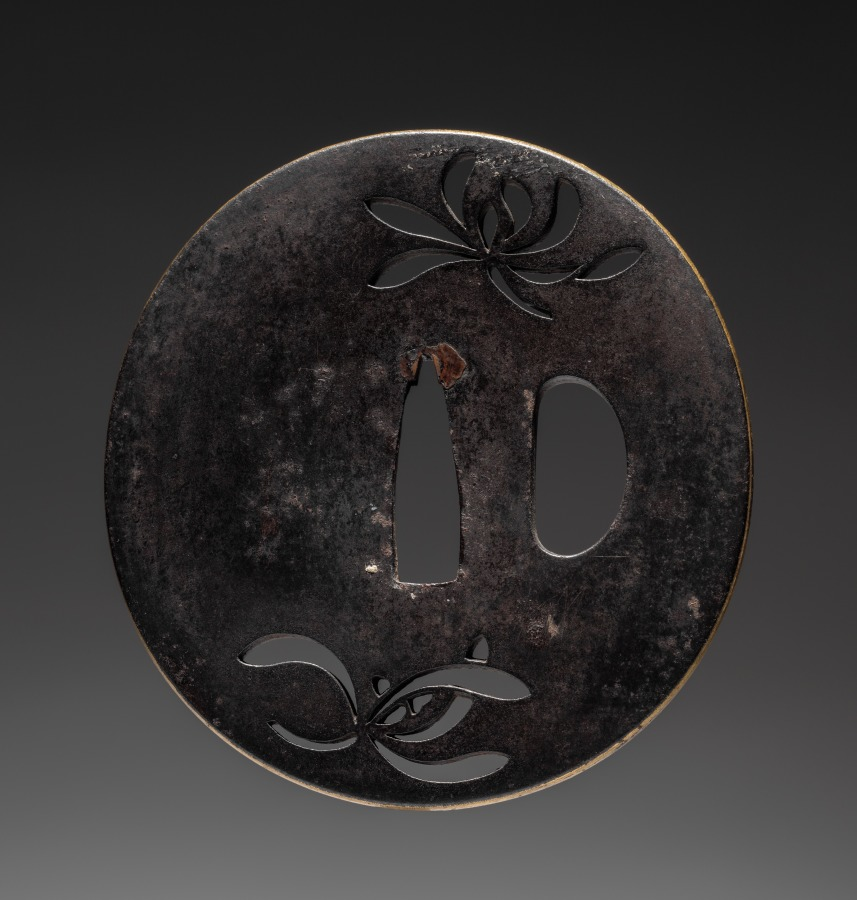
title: Sword Guard (Tsuba)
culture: Japan, Edo period (1615–1868)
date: mid-1800s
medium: iron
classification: Arms and Armor